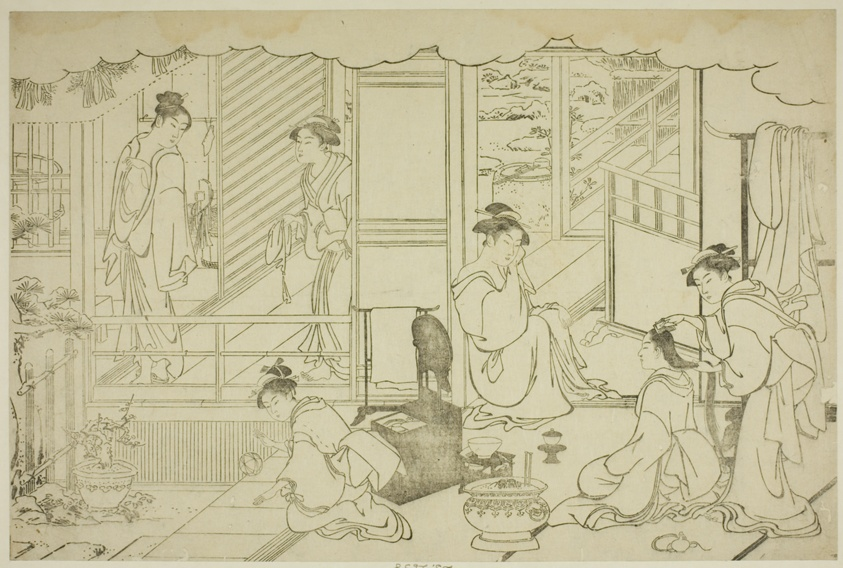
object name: Print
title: The First Bath of the New Year (Yudono hajime), from the illustrated book "Colors of the Triple Dawn (Saishiki mitsu no asa)"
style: Japanese (culture or style)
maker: Torii Kiyonaga (Japanese, 1752-1815)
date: c. 1787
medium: Woodblock print; oban, keyblock proof impression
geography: Japan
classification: woodblock print; print; asian art; woodblock